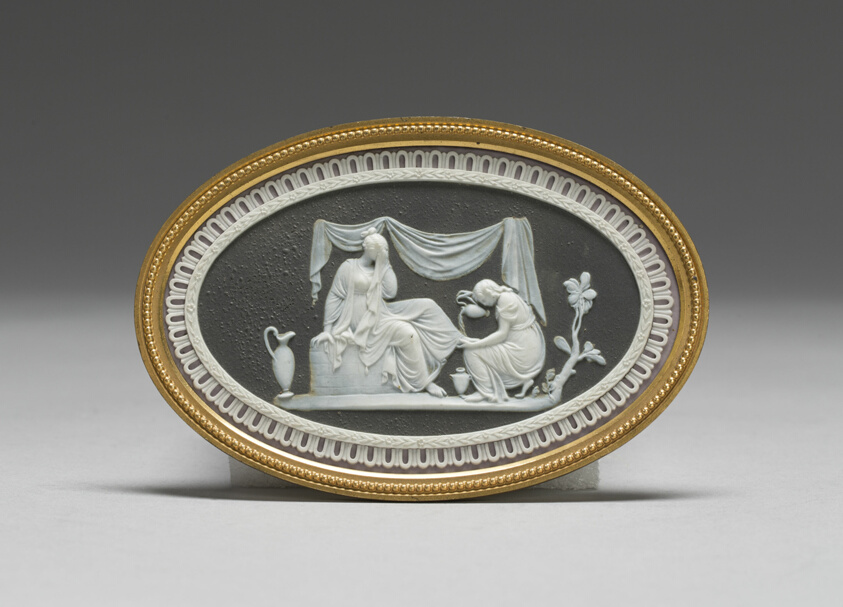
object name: Ceramics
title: Friendship Consoling Affliction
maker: Wedgwood Manufactory; England, founded 1759; Etruria, Staffordshire, England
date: 1785/90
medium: Stoneware (jasperware), gilt metal frame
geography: Burslem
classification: sculpture; stoneware; european decorative arts; ceramics